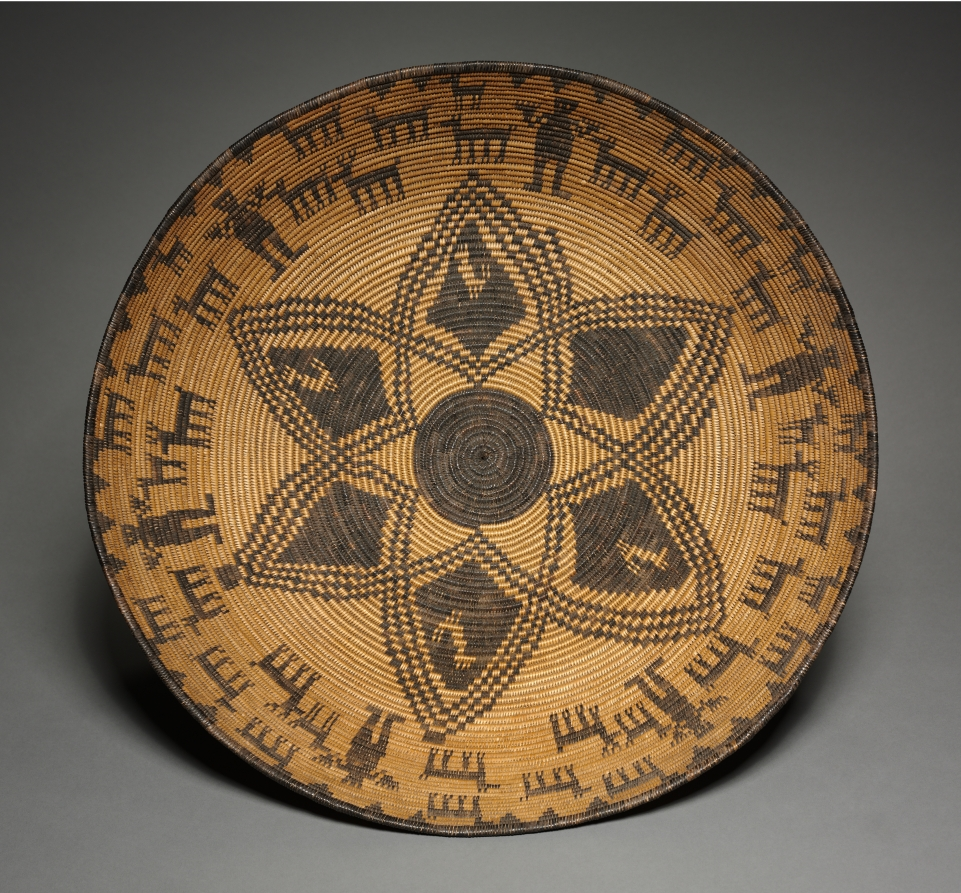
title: Tray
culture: Southwest, Apache, Western, early 20th century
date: early 1900s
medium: basketry, coiled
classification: Basketry